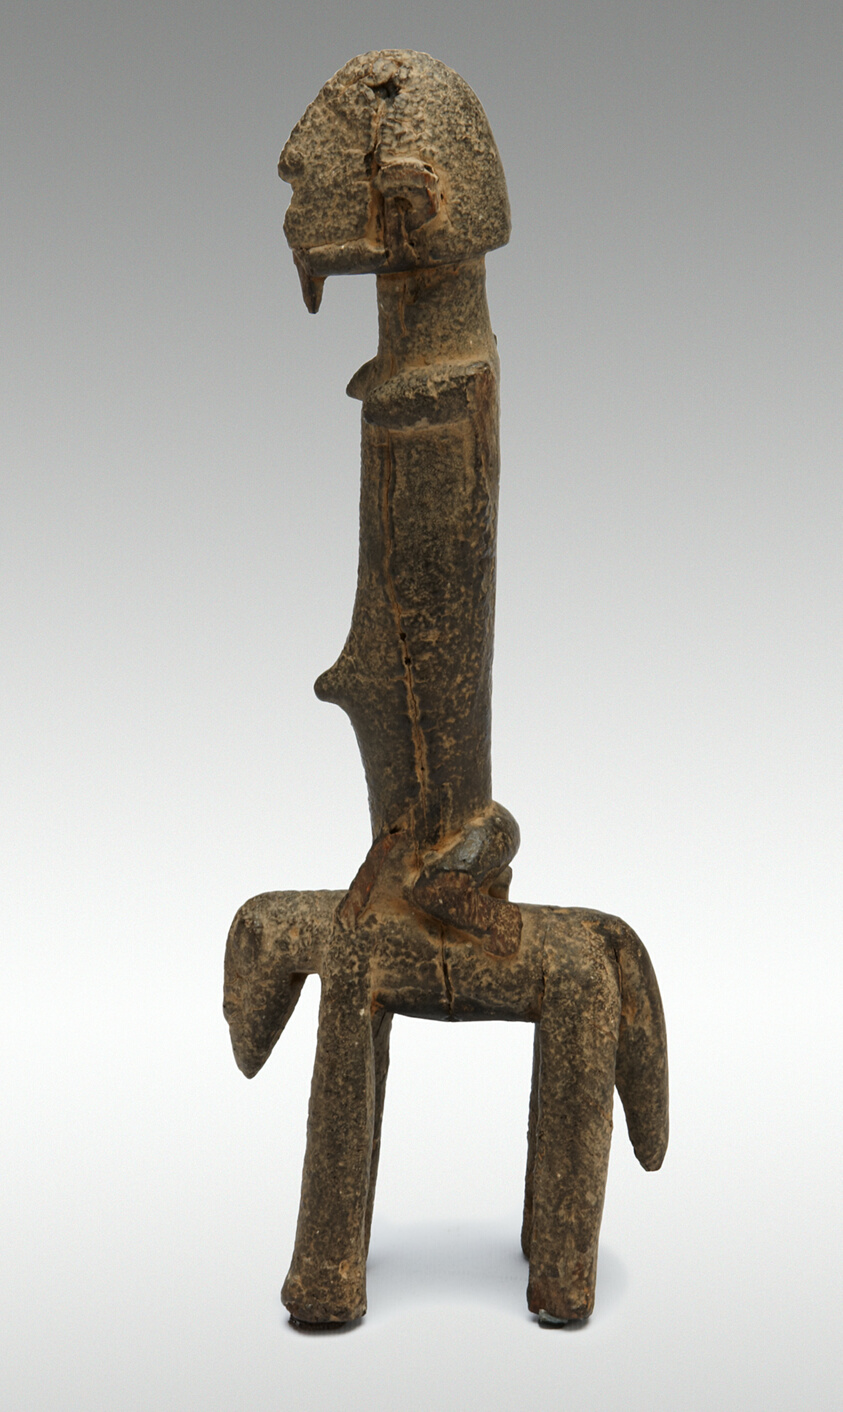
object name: Sculpture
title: Equestrian Figure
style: dogon, Arts of Africa, african Art, tellem, Northern Africa and the Sahel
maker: Dogon or Tellem; Bandiagara region, Mali; Northern Africa and the Sahel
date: 16th/19th century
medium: Wood and sacrificial material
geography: Mali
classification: sculpture; wood; arts of Africa; african art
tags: equestrian, animals, rider, horse